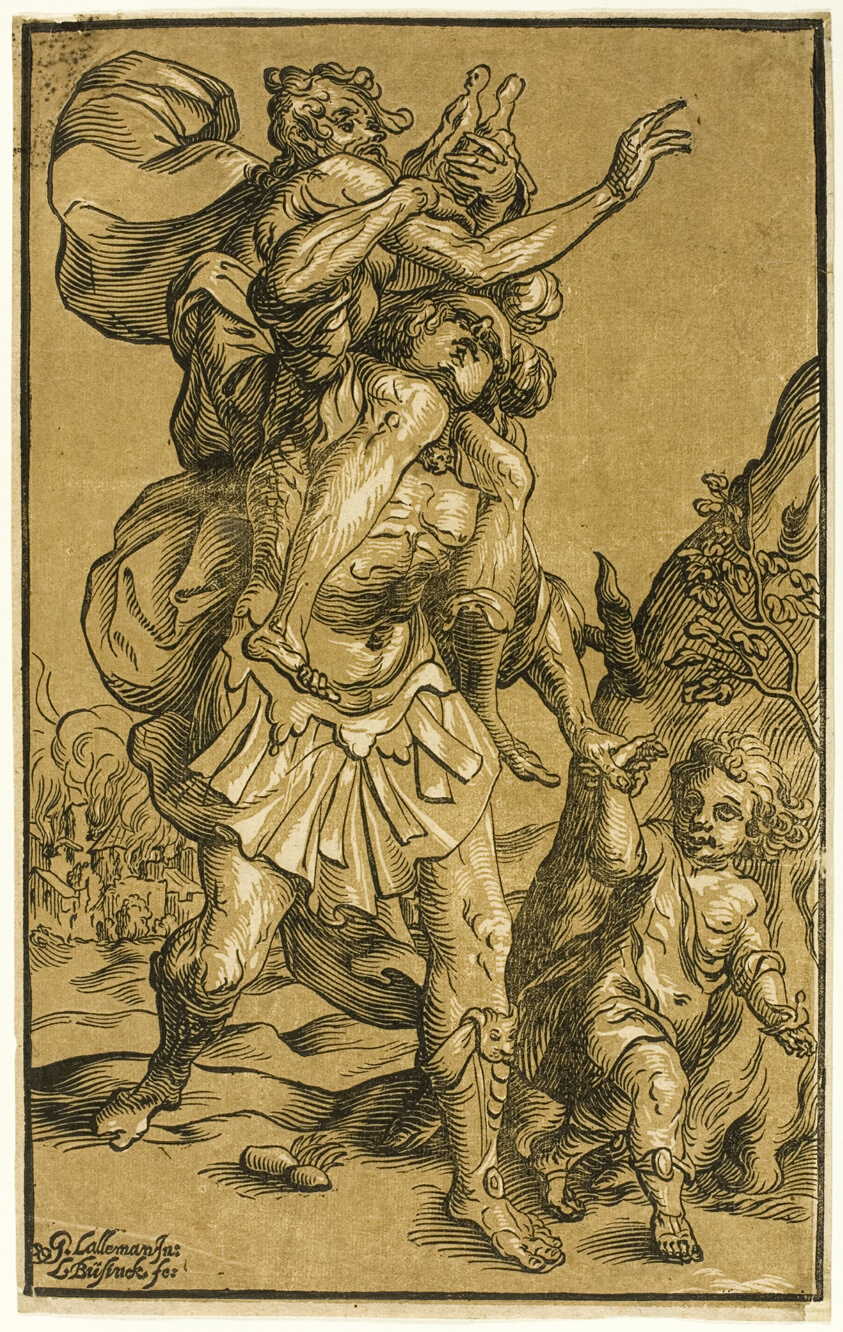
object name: Print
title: Aeneas Carrying His Father, Anchises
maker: Ludolph Büsinck (German, 1599/1602–1669); after Georges Lallemand (French, 1575–1636)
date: 1643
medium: Chiaroscuro woodcut from two blocks in black and beige on ivory laid paper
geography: Germany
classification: woodcut; print; prints and drawing